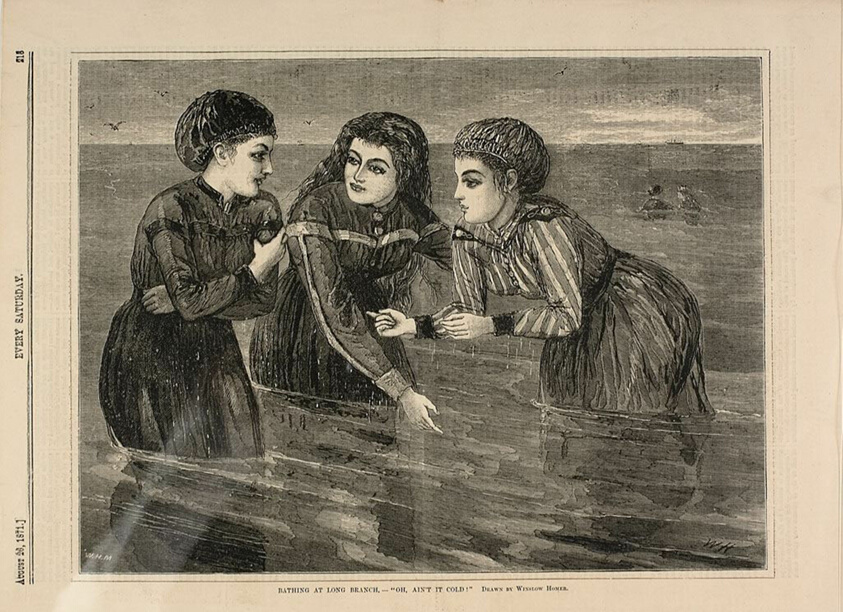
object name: Print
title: Bathing at Long Branch—"Oh, Ain't it Cold"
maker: Winslow Homer (American, 1836-1910); published by Every Saturday (American, 1866-1874)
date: published August 26, 1871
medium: Wood engraving on paper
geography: United States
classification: wood engraving; print; prints and drawing